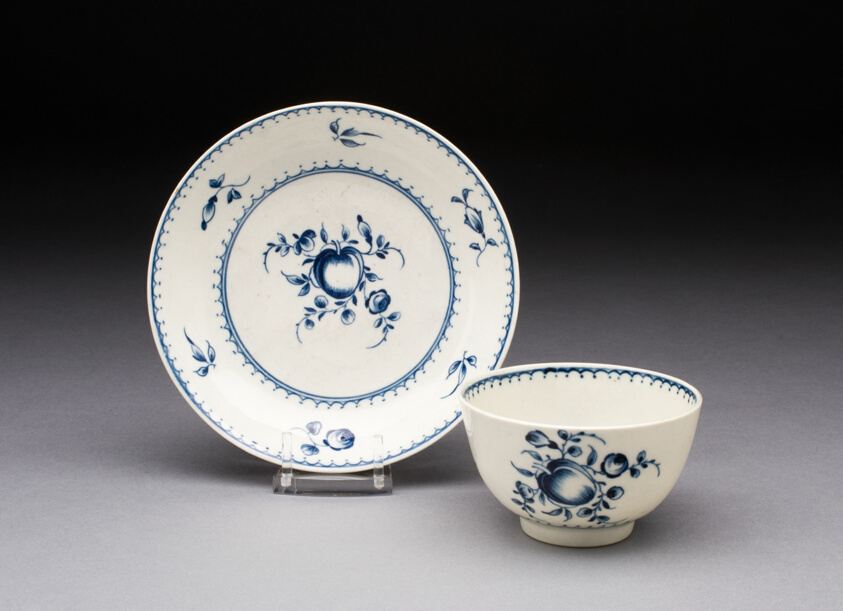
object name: Ceramics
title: Cup and Saucer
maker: Worcester Porcelain Factory (Warmstry House Period, 1751–1783); Worcester, England, founded 1751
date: c. 1775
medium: Soft-paste porcelain with underglaze blue decoration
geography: Worcester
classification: drinking vessel; teaware; porcelain; european decorative arts; ceramics